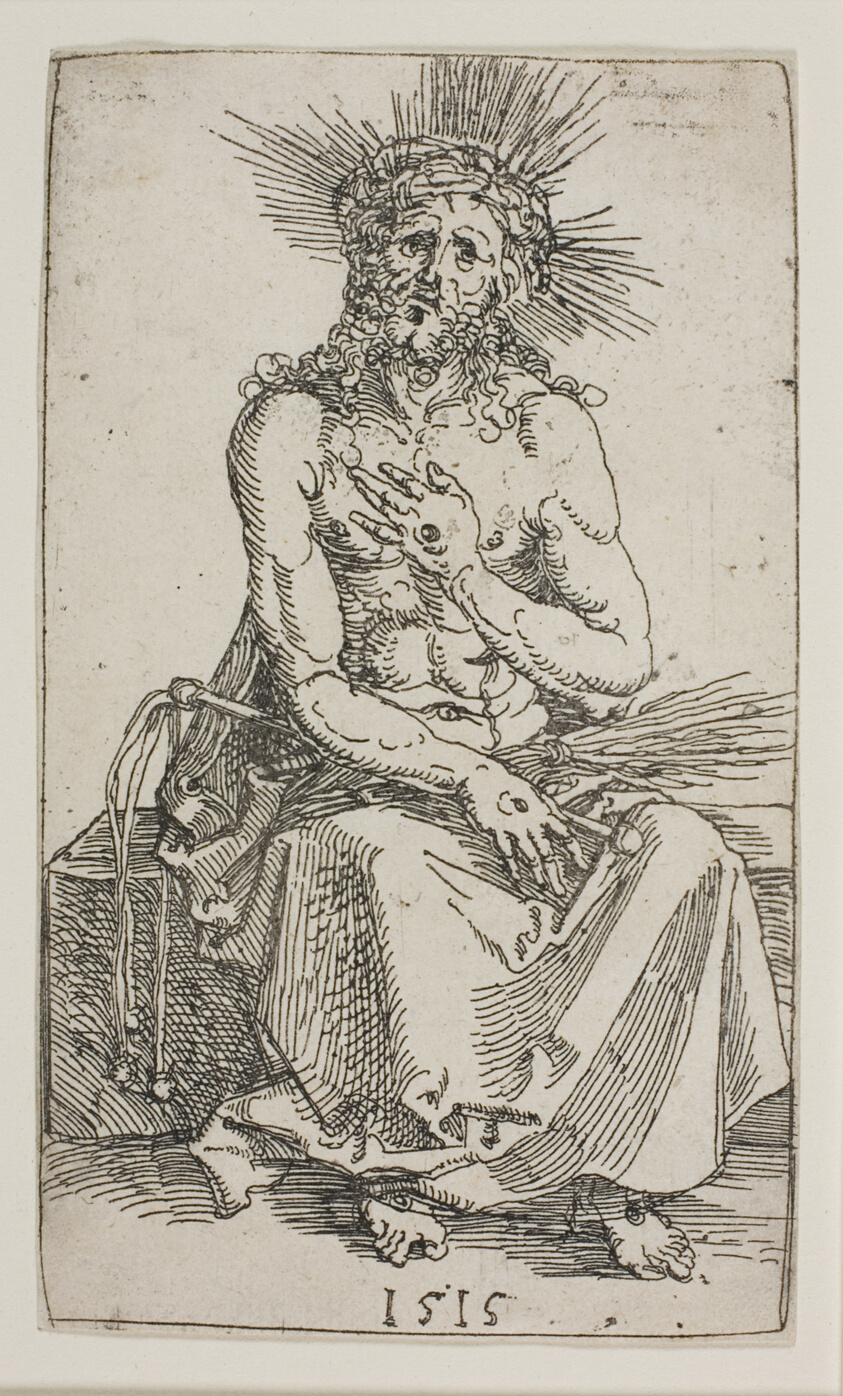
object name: Print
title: Man of Sorrows, Seated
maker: Albrecht Dürer (German, 1471-1528)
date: 1515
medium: Etching in black on ivory laid paper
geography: Germany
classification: engraving; print; prints and drawing; paper